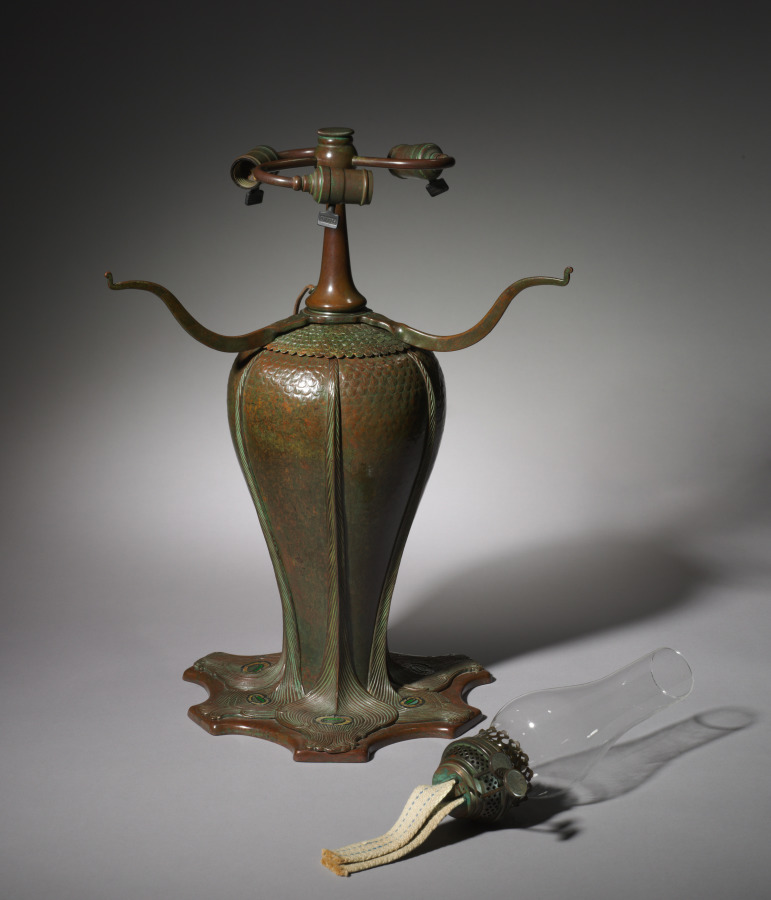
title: Peacock Table Lamp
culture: America, New York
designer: probably by Clara Wolcott Driscoll (American, 1861–1944)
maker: Tiffany Studios (United States, New York, 1902–32)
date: c. 1902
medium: Leaded glass, bronze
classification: Lamp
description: The peacock, with its brilliantly colored iridescent plumage, was a favorite motif of Louis Comfort Tiffany, appearing in almost every genre of his artistic production. The Peacock table lamp, created by Tiffany's chief lamp designer Clara Wolcott Driscoll, evokes the wide circular swath of a peacock's preening feathers and attracted critical acclaim to both Driscoll and Tiffany Studios. This particular version retains its original kerosene burning fluid apparatus as well as an electric bulb armature. Although incandescent lamp bulbs had become more widely available in the 1890s, most households, even those of the wealthy, were not yet wired for electricity. Tiffany originally designed his lamps with an oil-burning apparatus, consisting of a reservoir and a double wick and chimney, as well as an electric attachment. He cleverly predicted, though, that electric households would eventually become commonplace, so he soon moved to all-electric designs, greatly increasing the illumination and appeal of his lamps.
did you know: Originally designed to burn kerosene, this Peacock lamp still retains its original double wick and oil reservoir along with an adapter for electric light bulbs.